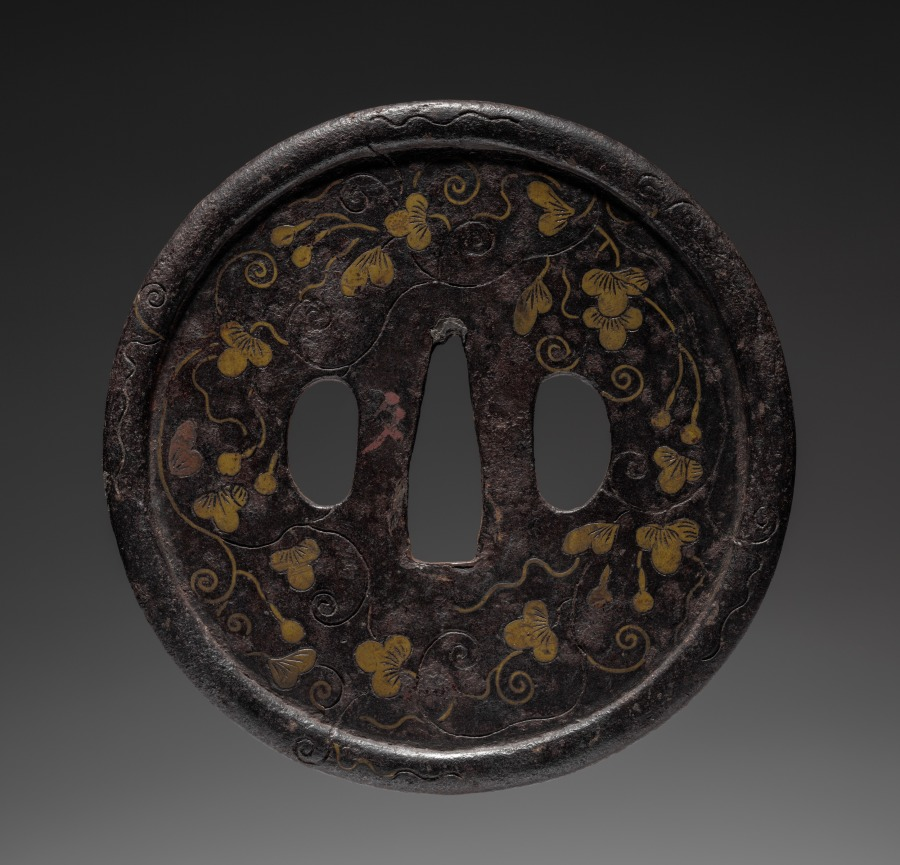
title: Sword Guard (Tsuba) with Gourds on Vine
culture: Japan, possibly Edo period (1615-1868)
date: c. 1615–1868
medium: iron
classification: Arms and Armor